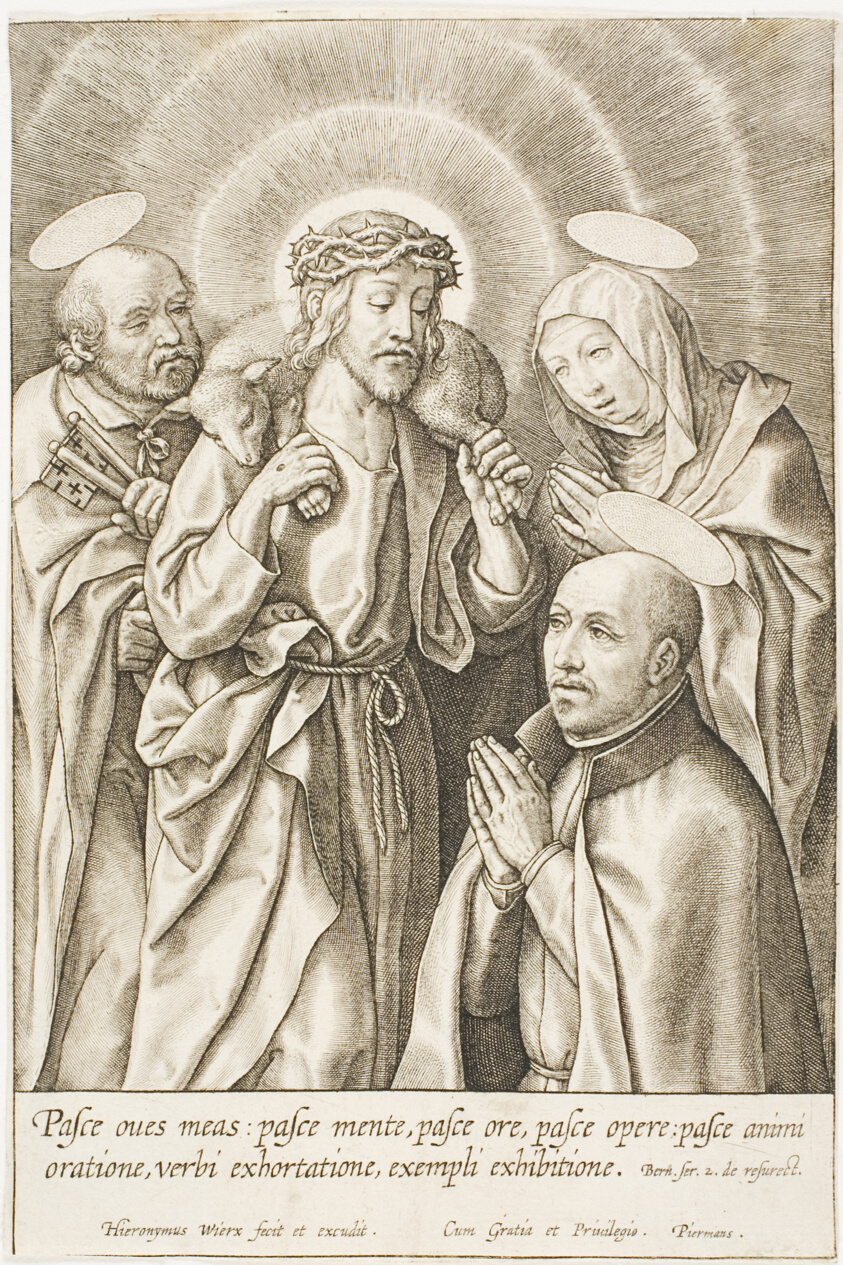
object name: Print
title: Ignatius of Loyola kneeling before Christ, the Virgin and St Peter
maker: Jan Wierix; Flemish, 1549-c. 1620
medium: Engraving in black on ivory laid paper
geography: Flanders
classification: engraving; print; prints and drawing